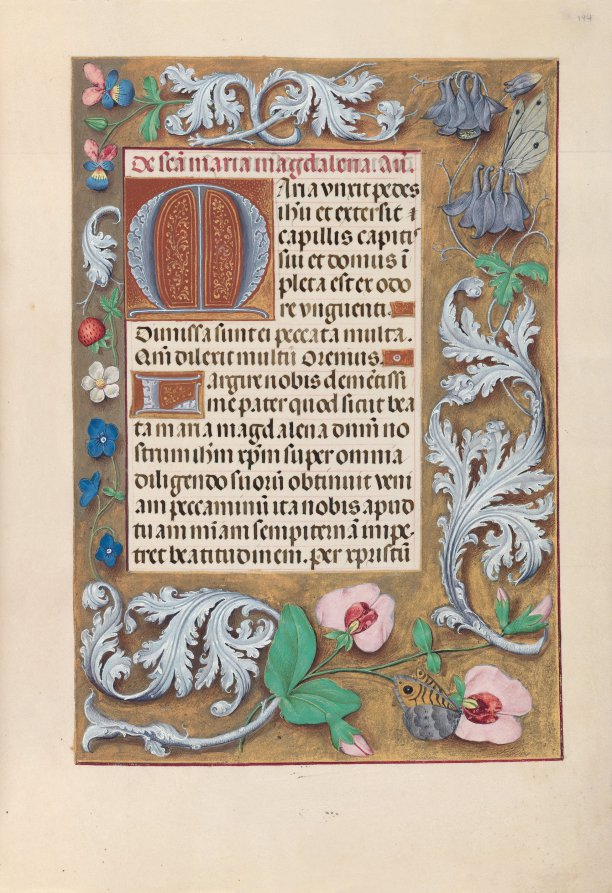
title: Hours of Queen Isabella the Catholic, Queen of Spain: Fol. 194r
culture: Flanders, Ghent and Bruges, late 15th century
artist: Master of the First Prayerbook of Maximillian (Flemish, c. 1444–1519)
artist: and Associates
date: c. 1500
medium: ink, tempera, and gold on vellum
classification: Bound Volume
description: This manuscript was illuminated by a circle of at least five highly organized manuscript painters active in the Flemish cities of Ghent and Bruges. The principal illuminator was Alexander Bening, who painted the majority of the book's miniatures. Manuscripts produced by this circle of artists are renowned for the decoration of their borders, which typically feature a rich variety of realistically-painted flowers, birds, and butterflies. This prayer book, called a book of hours, was intended not for a cleric, but for the private devotions of a lay person-in this case, Isabella the Catholic, Queen of Spain (1451-1504). Isabella's coat of arms embellishes the book's frontispiece. It is unlikely that the book was commissioned by the Queen herself; rather, she probably received it as a diplomatic gift from someone courting her patronage, perhaps Cardinal Francisco Jimenez de Cisneros. A Franciscan friar, Jimenez was dependent upon Isabella for his advancement, first to the post of Queen's confessor in 1492, and then to Archbishop of Toledo in 1495.